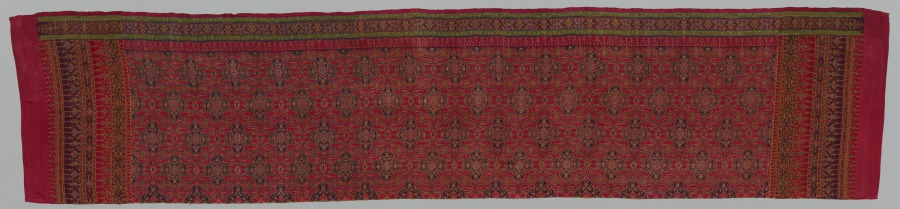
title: Half of a "Sampot" (Skirt Cloth)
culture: Cambodia, 19th - early 20th century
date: 1800s–early 1900s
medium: tabby weave, weft ikat; silk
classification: Textile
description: Ikat-dyed silks from Southeast Asia are weft ikats. Both the technique and the use of silk originated in India and spread to those parts of Southeast Asia that were accessible to international trade. There, it gradually replaced the earlier technique of warp ikat using cotton. The antiquity of this technique in Cambodia is indicated by weft-ikat designs that are preserved on sculptures of the Ankor period (9th-13th centuries). The diagonal lattice pattern in the central field of this textile was common throughout Southeast Asia. Because the textile was inteded to be a skirt cloth, there is little figural representation in its design.